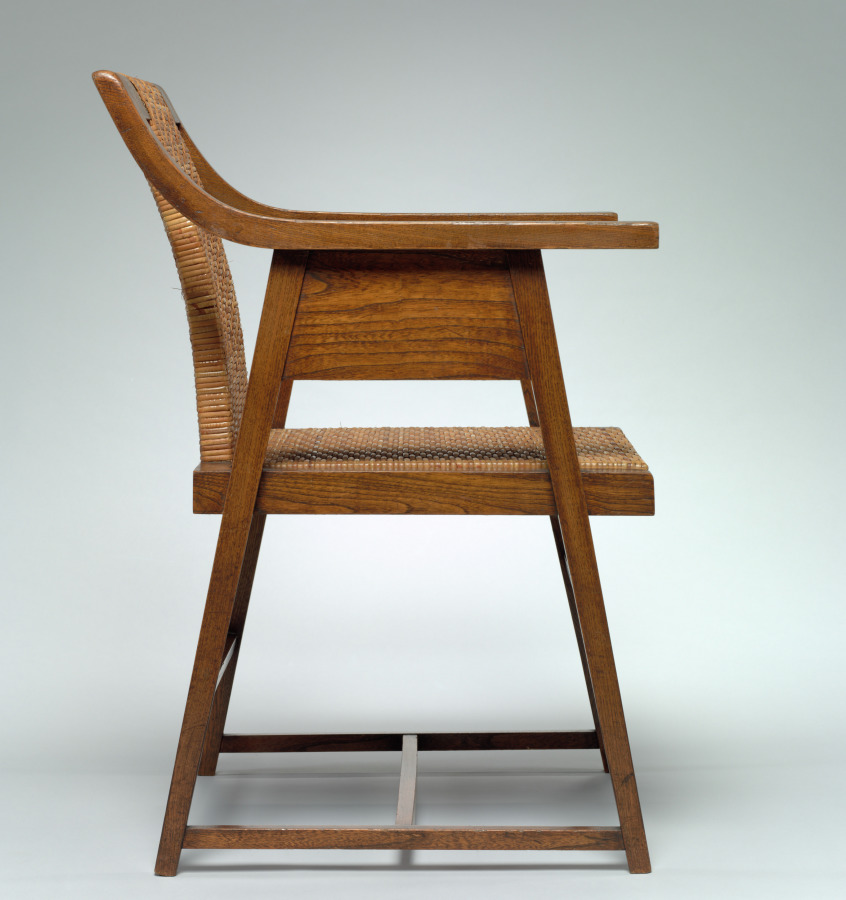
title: Armchair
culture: Austria, Vienna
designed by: Hans Vollmer (Austrian, 1879-)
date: c. 1904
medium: oak with replacement upholstered slip seat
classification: Furniture and woodwork